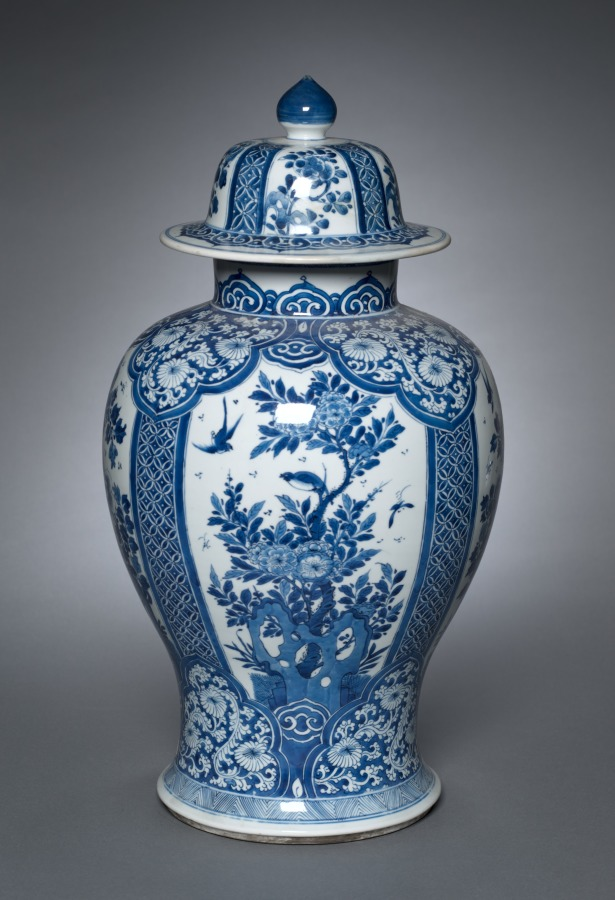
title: Vase with Cover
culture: China, Jiangxi province, Jingdezhen kilns, Qing dynasty (1644–1911), Kangxi reign (1662–1722)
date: 1662–1722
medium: porcelain with underglaze blue decoration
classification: Ceramic